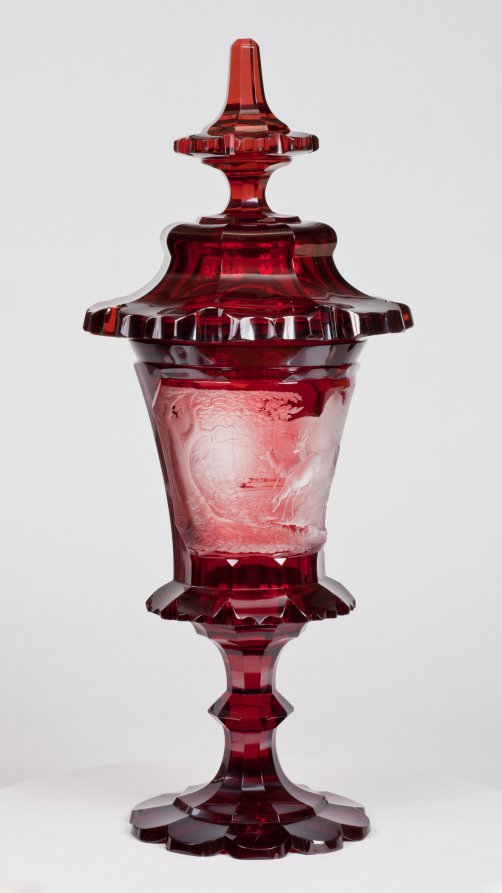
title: Covered Cup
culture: Bohemia, 19th century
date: mid-1800s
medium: ruby glass with engraved decoration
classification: Glass